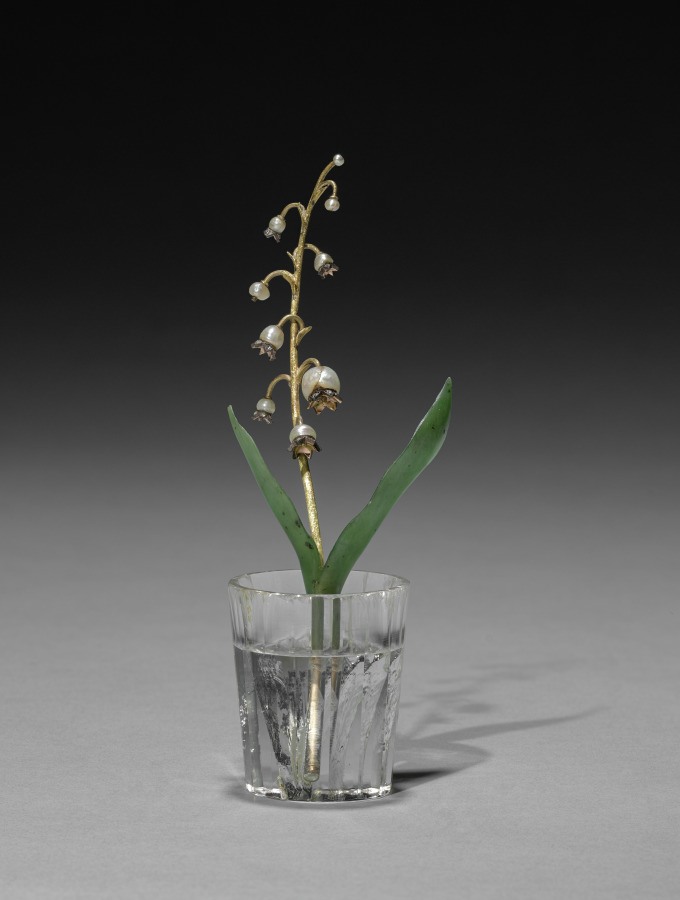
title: Flower Study of a Lily of the Valley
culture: Russia, St. Petersburg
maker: House of Fabergé (Russian, 1842–1918)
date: c. 1885–1915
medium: pearls, diamonds, jade, rock crystal, silver, gold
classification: Miscellaneous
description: This flower study resembles a stem of lily-of-the-valley. Fabergé’s inspiration for his flower studies is said to have come from the floral brooches of precious stones that were made in the 1700s for Catherine the Great as well as from the Japanese art of flower arranging, known as ikebana. Small and delicate, Fabergé’s flower studies were given as intimate gifts to friends by the tsarina and others in the court. She also liked to take them around to wherever the imperial family was residing as a reminder of spring during the harsh Russian winters.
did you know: The stems of Fabergé’s flower studies are set into little basins carved from rock crystal to resemble pots of water.